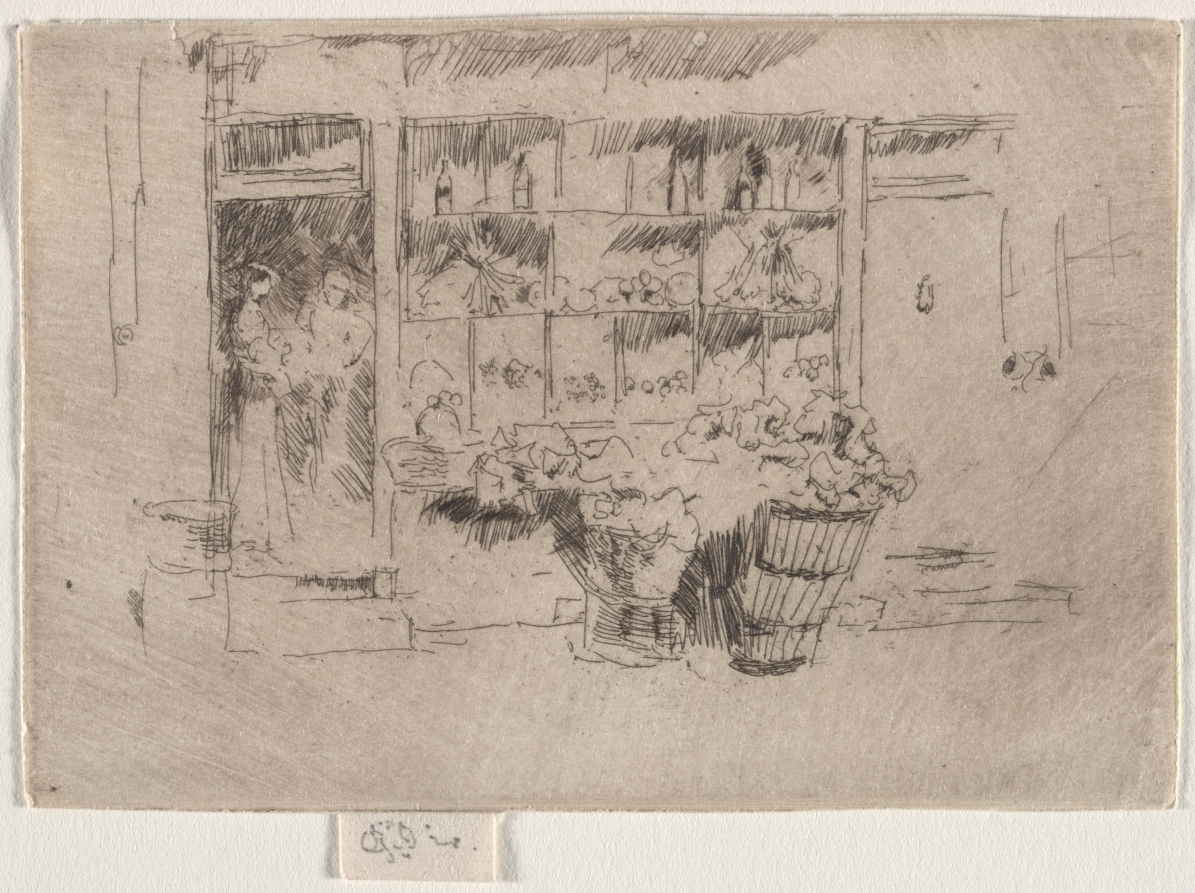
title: Fruit Shop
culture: America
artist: James McNeill Whistler (American, 1834–1903)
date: 1886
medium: etching and drypoint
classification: Print